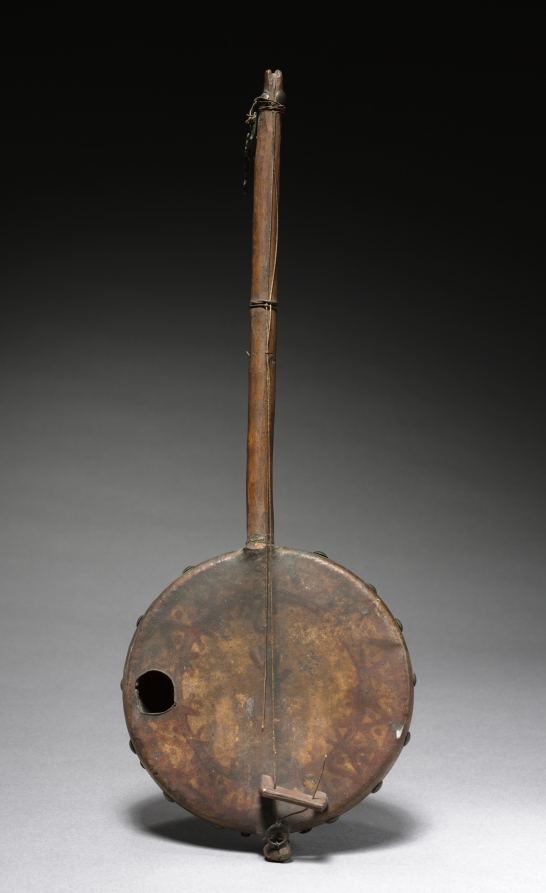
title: Mandoline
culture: Africa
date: 1900s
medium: Wood, rawhide, upholstery studs, string, metal, and colorant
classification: Musical Instrument